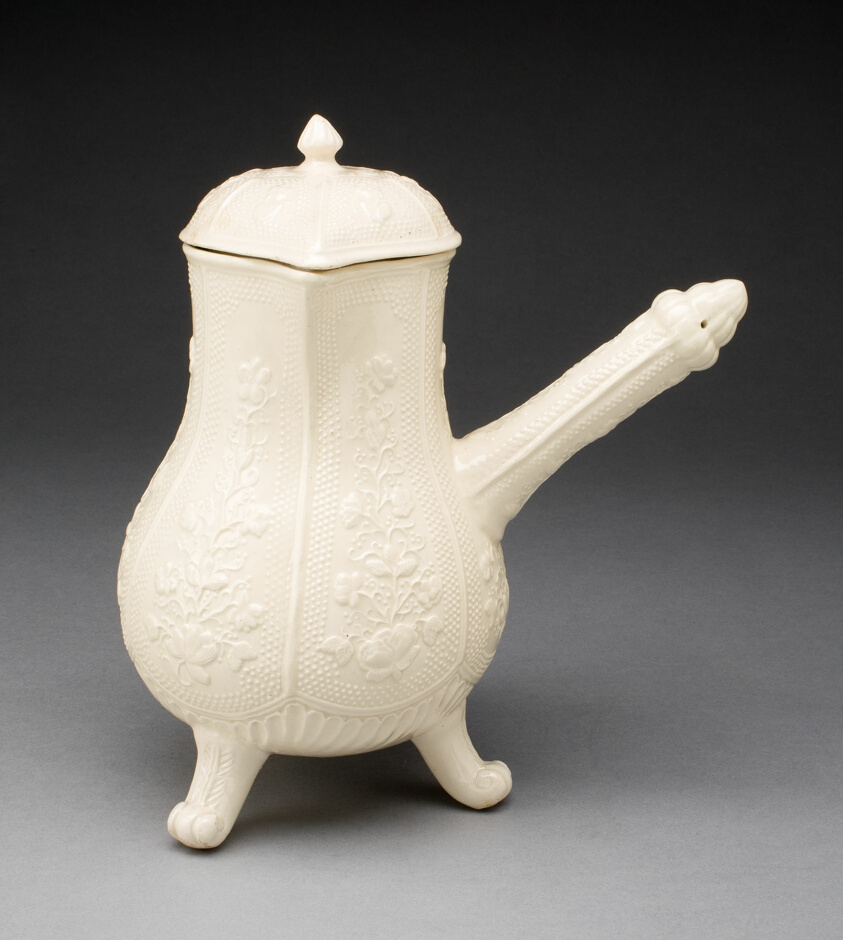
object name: Ceramics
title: Chocolate Pot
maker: Rambervillers Pottery Factory or Septfontaines Pottery Factory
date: c. 1775/1800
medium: Lead-glazed earthenware (faience)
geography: France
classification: earthenware; european decorative arts; ceramics